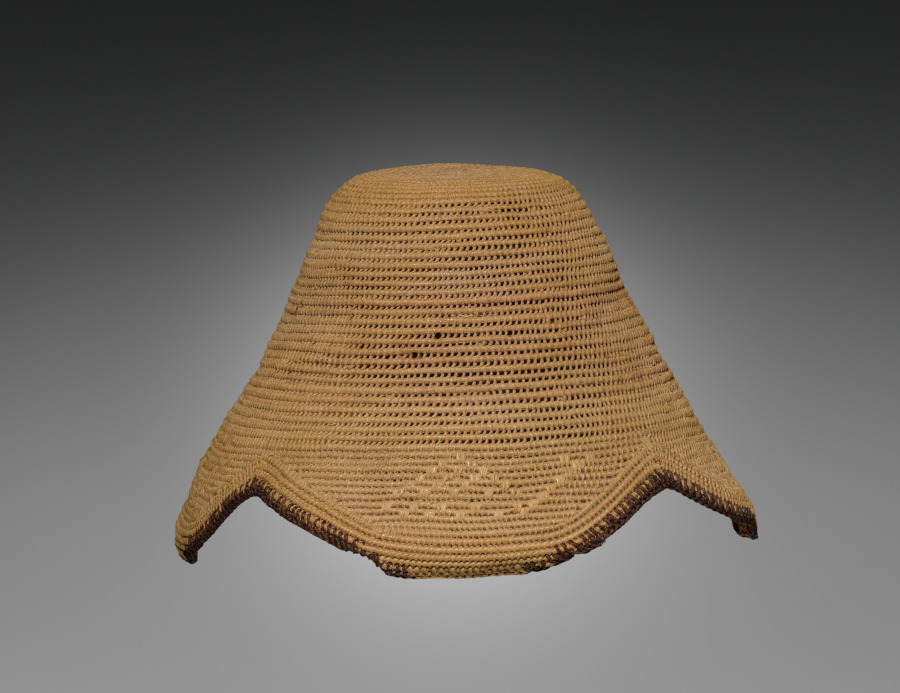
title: Hat (laket)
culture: Africa, Central Africa, Democratic Republic of the Congo, Kuba-style maker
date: early 1900s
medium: Raffia and dye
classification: Garment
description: Titled Kuba men and prominent women wear the laket, a small ornate dome-shaped hat. An essential fashion item of adult men in good social standing, it focuses special attention on the head as a significant marker of individual identity, ethnic affiliation, status, and role in society. This prestige object is secured on the crown of the head with a nine-and-a-half-inch metal pin that pierces through the hat onto a clump of hair. This laket is made from raffia palm fiber coiled into threads and woven in different patterns. There are two examples of the laket: the plain type with the flat top, and the more elaborate type called the laket mishiing.